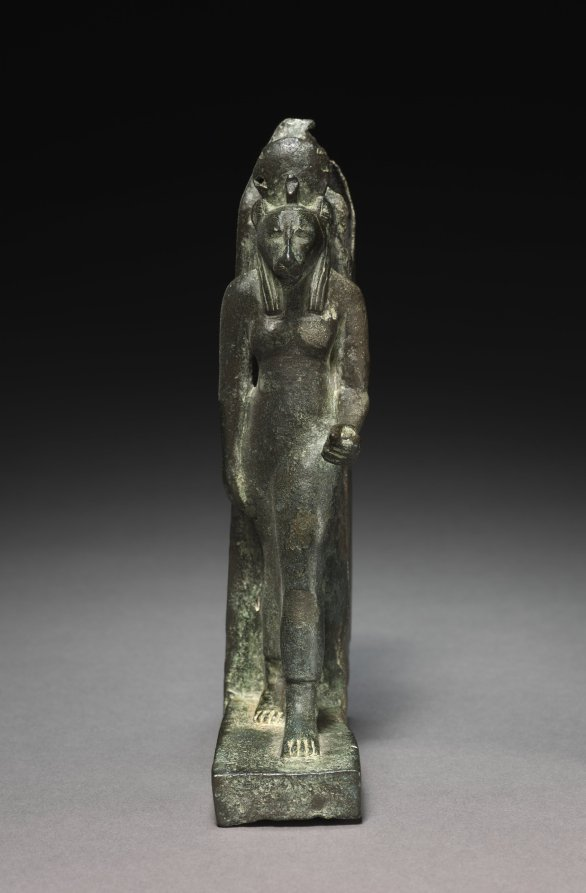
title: Statuette of Sekhmet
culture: Egypt, Late period (715–332 BCE), Dynasty 26 or later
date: 664–525 BCE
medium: bronze, figure solid cast, obelisk hollow cast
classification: Sculpture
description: The lion-headed goddess Sekhmet strides forward wearing a long, tight-fitting dress and striated wig indicating her divine nature. Behind her is an obelisk that is hollow and originally open at the bottom. Her left hand would have held an attribute such as a staff, which is now lost.